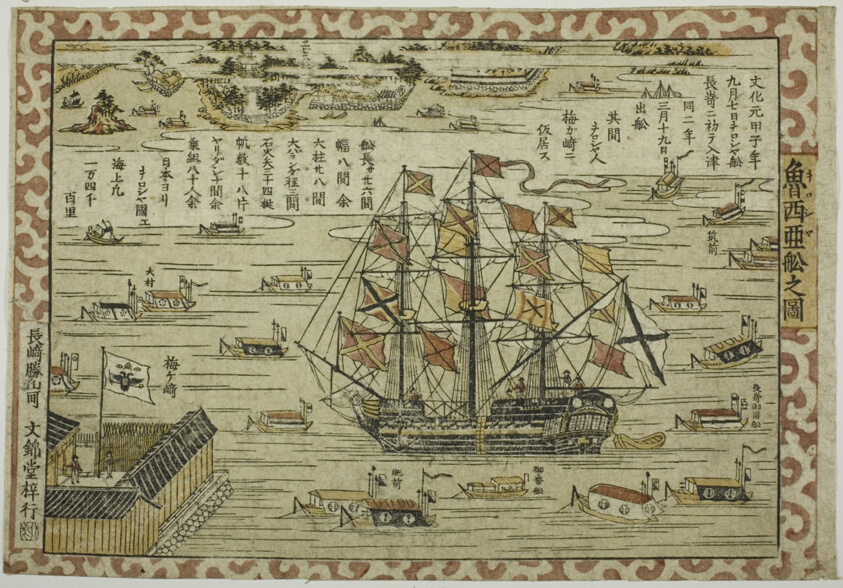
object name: Print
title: Sketch of a Russian Vessel, Resanov's Visit to Neagaski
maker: Unknown Artist (Japanese, date unknown)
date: 1805–1806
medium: Color woodblock print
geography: Japan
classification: woodblock print; print; asian art